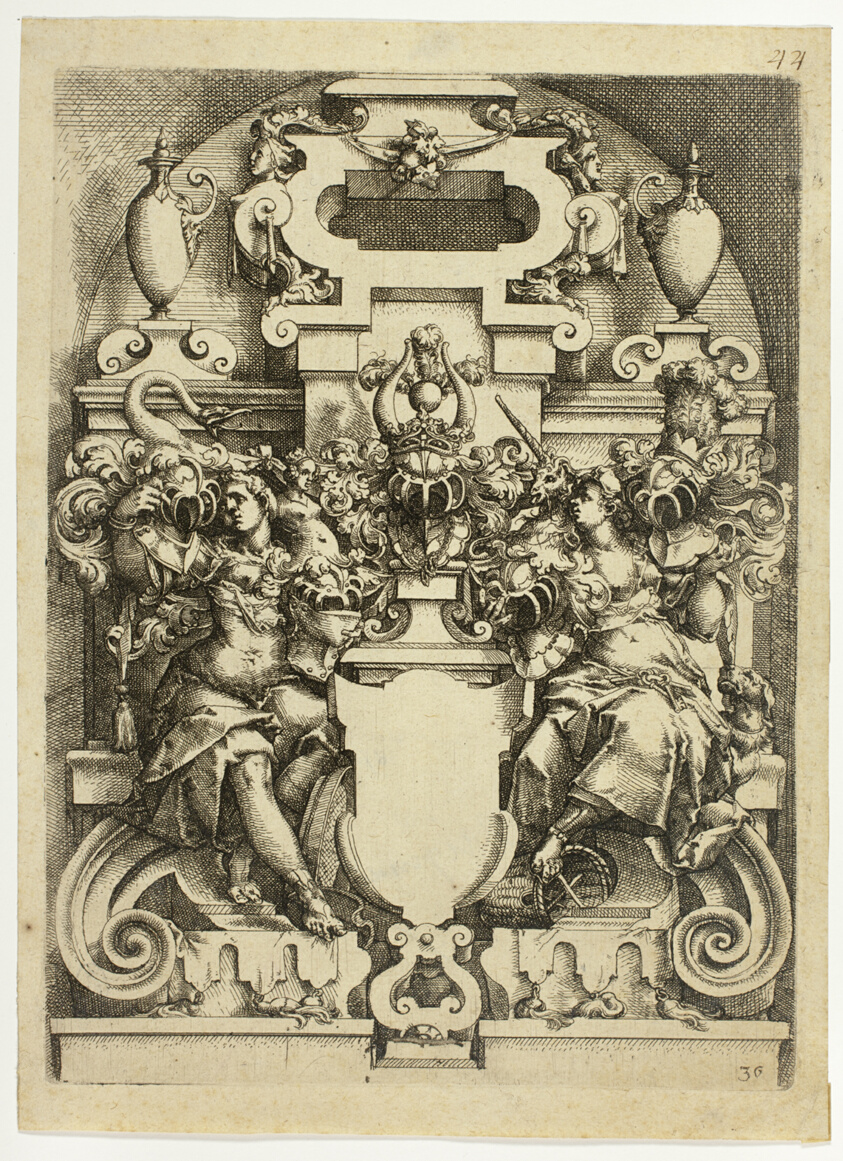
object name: Print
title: Fantastic Architecture, plate 36 (later 44, and 125) from Architectura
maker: Wendel Dietterlin (Austrian, c. 1550-1599)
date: c. 1596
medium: Etching in black ink on cream laid paper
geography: Austria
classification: etching; paper; print; prints and drawing